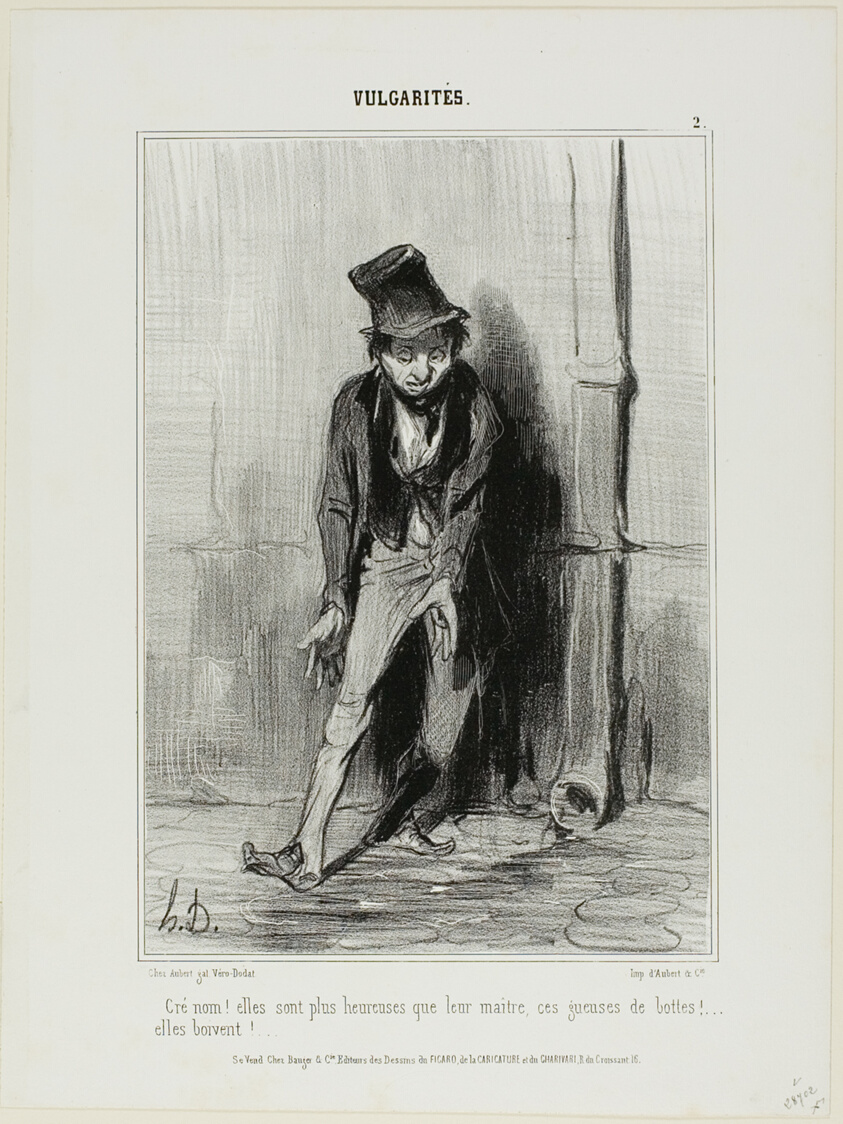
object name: Print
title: “Damn! They are happier than their master.... these bitches of boots... they drink!,” plate 2 from Vulgarités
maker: Honoré Victorin Daumier; French, 1808-1879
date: 1841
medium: Lithograph in black on white wove paper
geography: France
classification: lithograph; print; prints and drawing